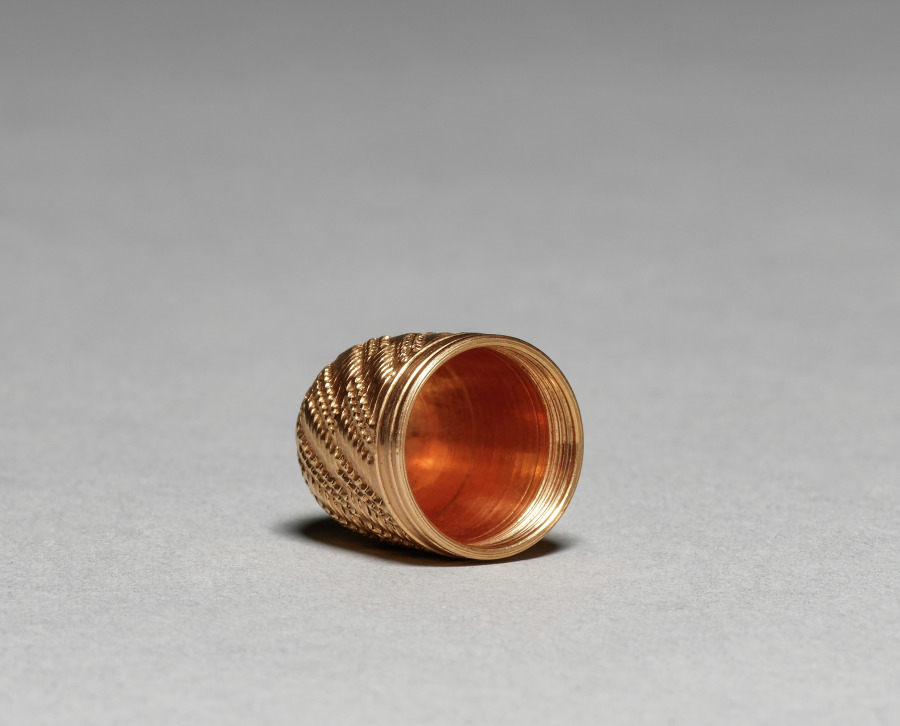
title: Thimble from a Sewing Box (Nécessaire)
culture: Austria, possibly Vienna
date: c. 1765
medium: gold and mother-of-pearl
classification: Miscellaneous